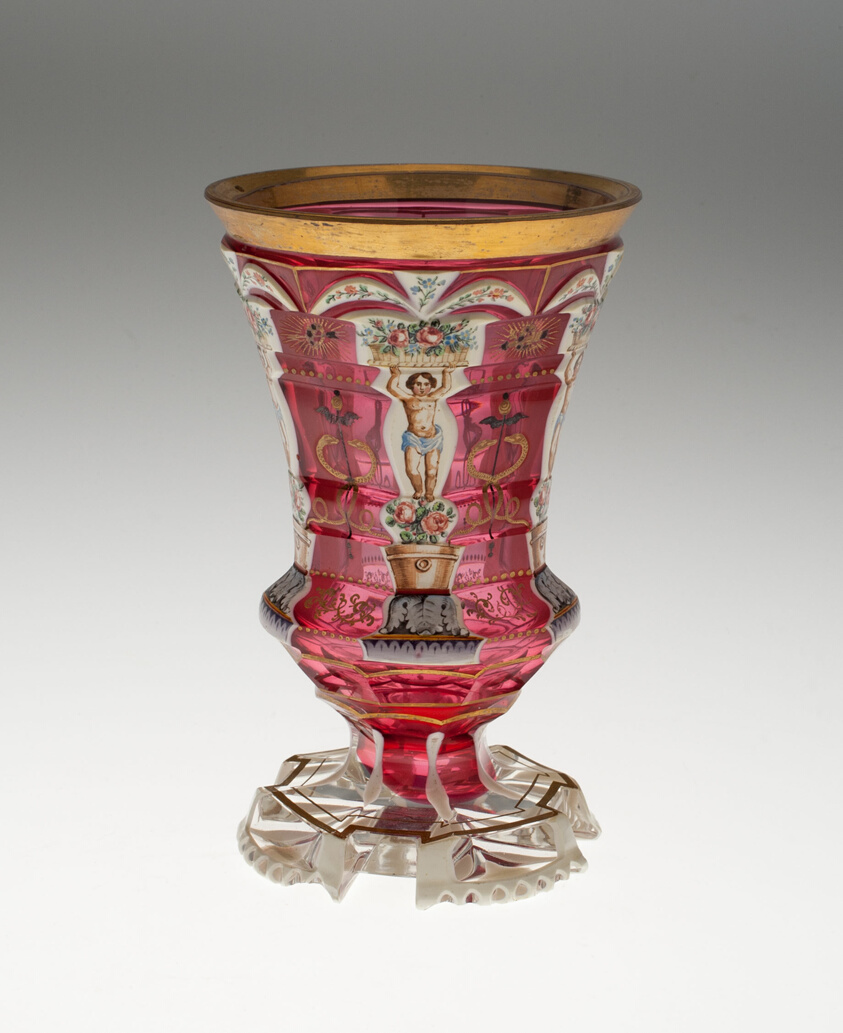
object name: Glass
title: Beaker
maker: Bohemia, Czech Republic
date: c. 1840/50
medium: Glass; blown, cut, stained, enamelled and gilded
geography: Bohemia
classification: drinking vessel; glass; european decorative arts